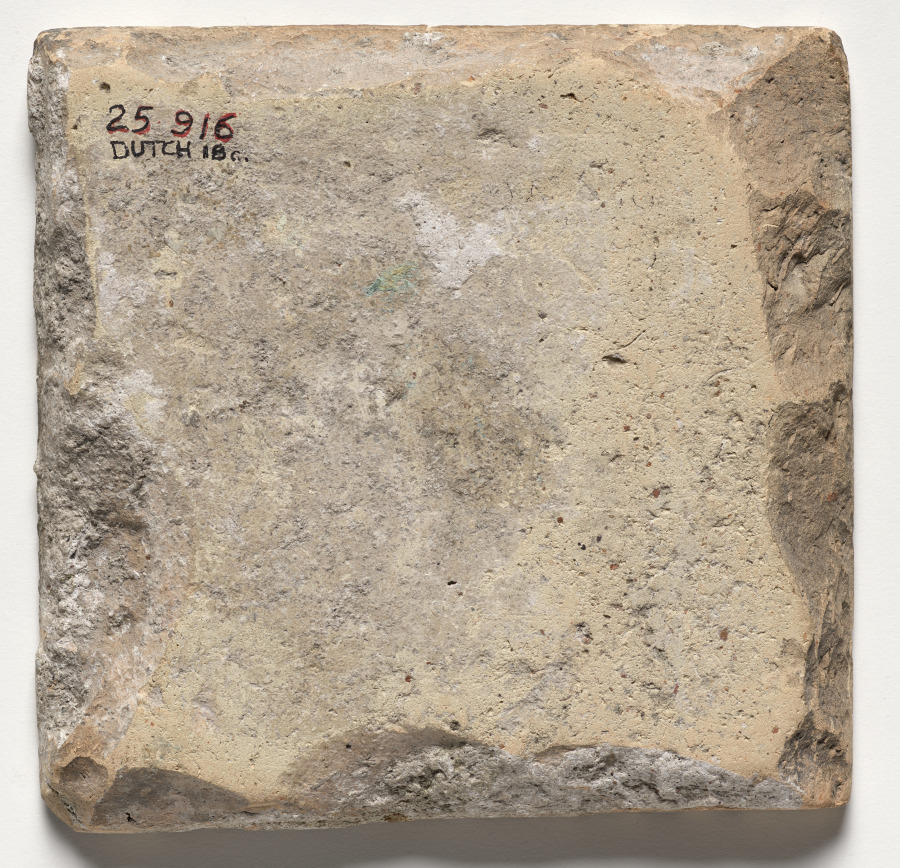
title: Tile- Central Motif in Diamond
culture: Netherlands, Holland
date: 1700s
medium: glazed ceramic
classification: Ceramic